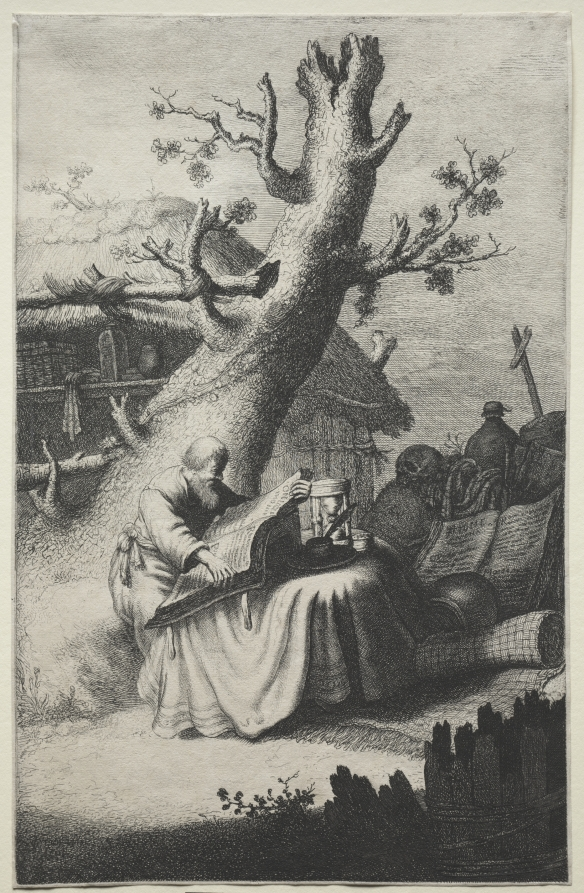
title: St. Jerome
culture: Netherlands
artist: Jan Georg van Vliet (Dutch, c. 1610–1635)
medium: etching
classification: Print